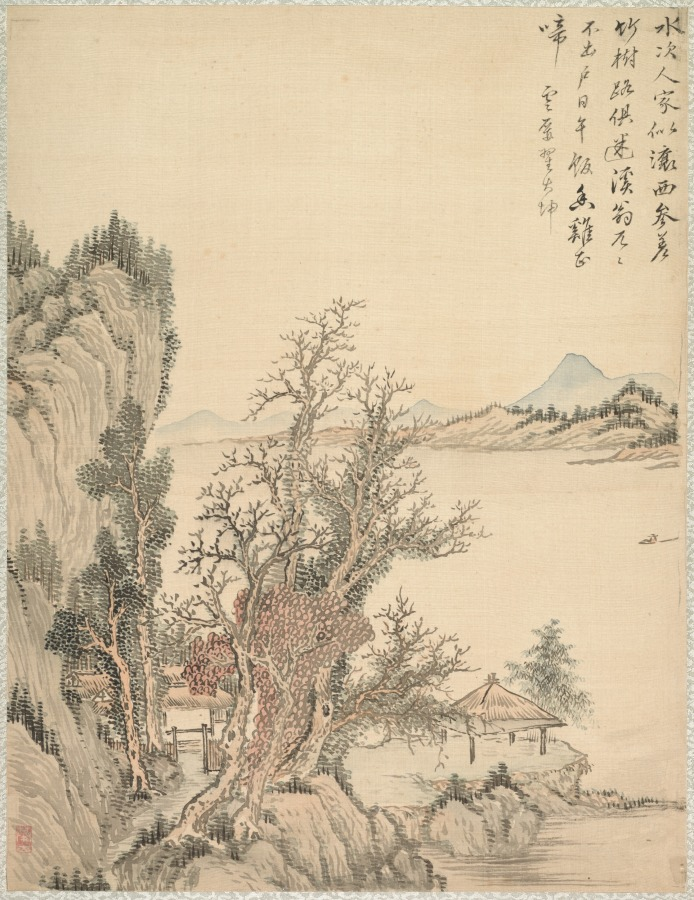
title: Dwelling by the Shore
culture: Japan, Edo period (1615–1868)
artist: Tsubaki Chinzan (Japanese, 1801–1854)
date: 1847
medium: album leaf; ink and color on silk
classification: Portfolio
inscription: Tsubaki Chinzan inscribed each leaf with the same inscription that Zhai Dakun wrote on his album leaves.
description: As the title of this album suggests, Tsubaki Chinzan painted each of the landscapes included in the album after interpretations of the styles of old masters by Chinese painter Zhai Dakun (翟大坤, active 1730–1804). In addition to the painted compositions, he also copied the inscriptions on Zhai Dakun's paintings.